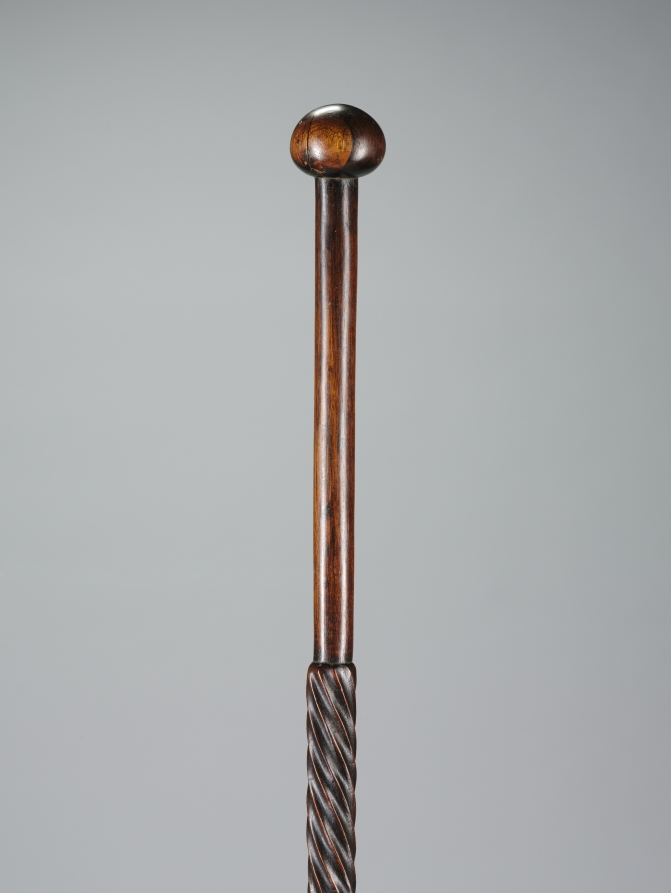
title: Prestige Staff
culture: Africa, Southern Africa, South Africa, Tsonga-style or Zulu-style maker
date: 1800s–1900s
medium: Wood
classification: Implements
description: The primary use of long staffs like this was purely practical; they served as walking companions when their pastoralist-owners covered long distances accompanying their cattle in search of new pastures. The tall height of this staff indicates the elevated status or special function of the man who owned it. Carved from one piece of wood, its spherical knob finial and the geometric designs incorporated into its shaft decoration—consisting of spiraling segments and chain links—demonstrate its maker’s superior skills.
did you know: Tsonga and Zulu staffs all have strong symbolic associations and value. They visually connect the identity of their owners with that of their ancestors and with that of the community to which they belong.